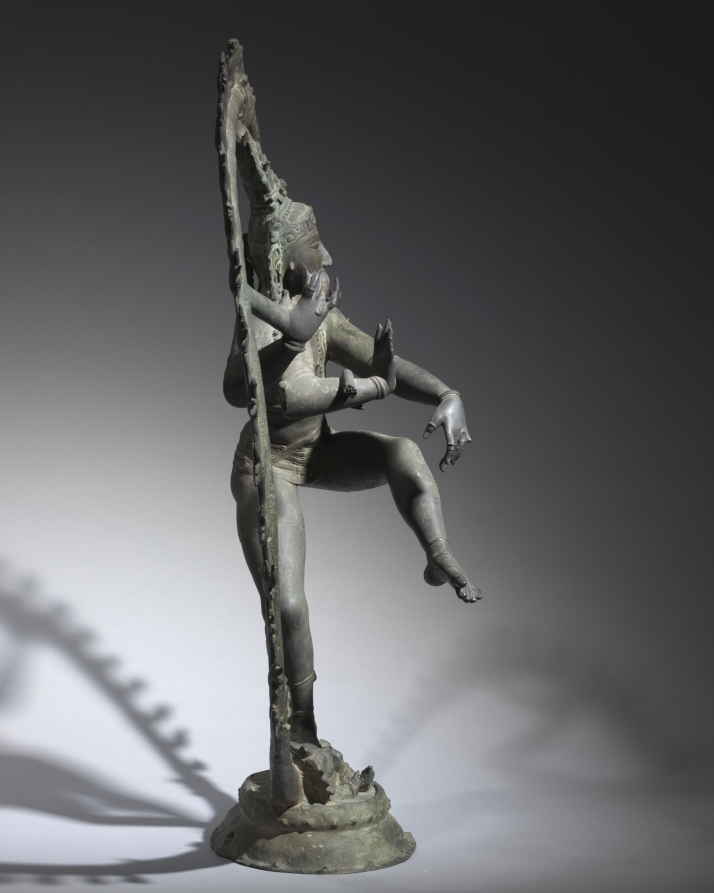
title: Nataraja, Shiva as the Lord of Dance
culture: South India, Tamil Nadu, Chola period (900-1200s)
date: 1000s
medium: Bronze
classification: Sculpture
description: One of the most celebrated sculptural forms in the history of Indian art, this elegant and dynamic figure embodies some of Hinduism’s most fundamental tenets. According to Hindu thought, time is cyclical; the world is created, maintained, preserved for a time, then destroyed, only to be created again an infinite number of times. For those Hindus who view Shiva to be the all-powerful creator divinity, he is responsible for both creation and destruction. The ring of fire and the tongue of flame he holds in his left hand refer to destruction, and the drum in his raised right hand refers to the relentless beat of time as it moves inevitably forward. His lower right hand, held up with the palm facing out, signals to his devotees not to be afraid of the impending destruction; they can be liberated from the cycles of birth and death through devotion to him, which he indicates by pointing to his upraised foot. With every step in his dance, he lands on a dwarfish figure personifying ignorance.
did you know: The trampled figure holds a serpent in his left hand and with his right points up to Shiva.